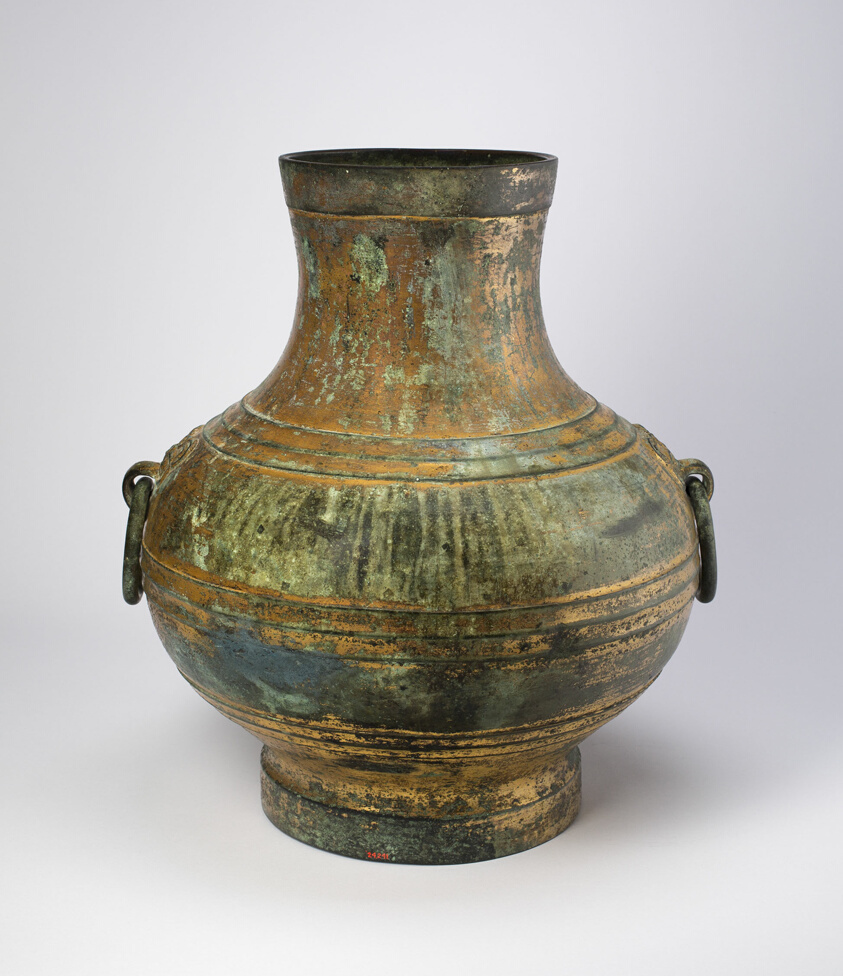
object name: Religious/Ritual Object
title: Wine Vessel (hu or zhong)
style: Chinese (culture or style)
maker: China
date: Western Han dynasty (206 B.C.–A.D. 9), 2nd/1st century B.C.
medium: Gilt bronze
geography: China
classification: vessel; bronze; vessel for serving drinks; metal; asian art; ritual objects